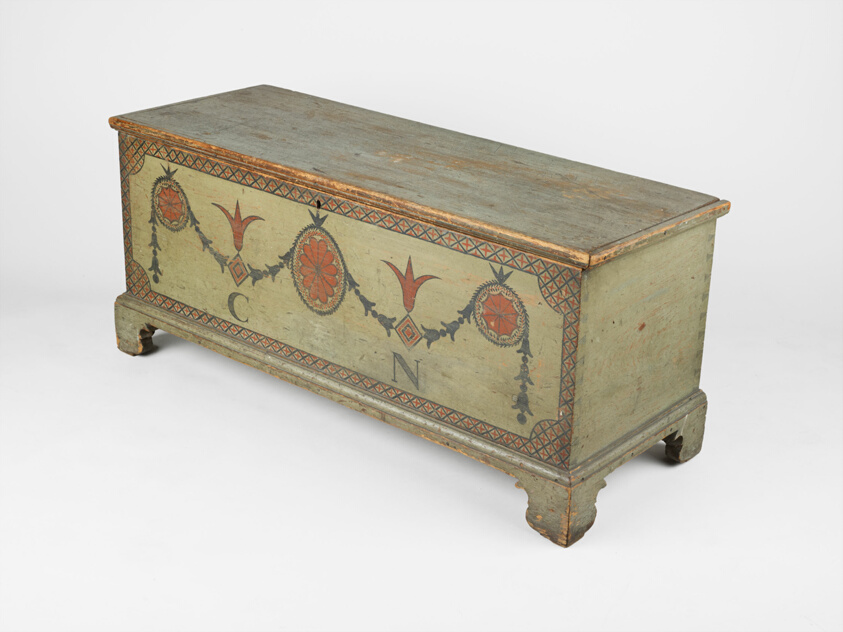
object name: Furniture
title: Chest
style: Folk Art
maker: Artist unknown (American, 19th century); Albany County, New York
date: 1805–20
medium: White pine and painted decoration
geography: Albany County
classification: case furniture; furniture; american decorative arts; american arts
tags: furniture